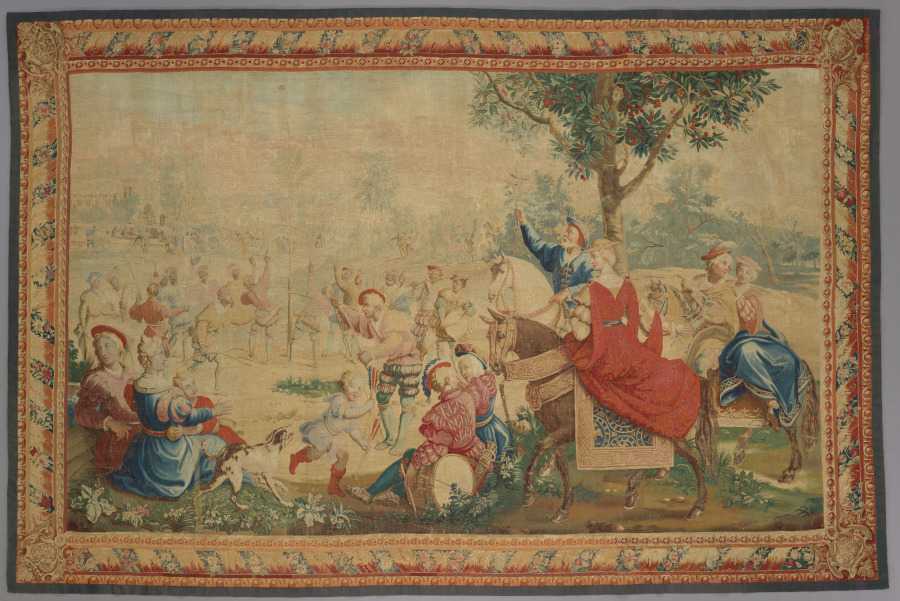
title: Month of May: Scene of May Day Festival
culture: France, 18th century, Period of Louis XV (1723-1774)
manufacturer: Gobelins Manufactory (France, Paris, est. 1662)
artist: Michel Audran (French, 1701–1771)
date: 1723–1774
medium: tapestry weave: linen warp, wool and silk wefts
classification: Tapestry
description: Seated spectators and splendidly clothed ladies and gentlemen on horseback watch May Day festivities in this tapestry. In the middle distance, archers prepare to shoot at a bush and bird placed atop a maypole, while more spectators congregate in the receding landscape. A border of rolled acanthus leaves and flower garlands frames the scene. This scene is one of twelve so-called Months of Lucas tapestries, each depicting activities that coincide with a month of the year. The original “Months of Lucas” was a sixteenth-century Flemish tapestry set that was owned by the French monarchy and mistakenly attributed to Lucas van Leyden during the 1600s. To this day, they continue to be known as the “Months of Lucas.” This original set was burned in 1797 so their gold and silver metal threads could be used to replenish the depleted French coffers. Beginning in the 1600s, the popular Months of Lucas were reproduced in several different versions under various masters at the Gobelins Manufactory in Paris, the famous royal production center for French tapestries since Louis XIV (1638–1715). The lower right hand corner of this tapestry bears the signature of Michel Audran (1701–1771), director of the Gobelins high-warp loom workshop from 1732–71, who produced this tapestry for a private patron in addition to the other royal commissions of the set.